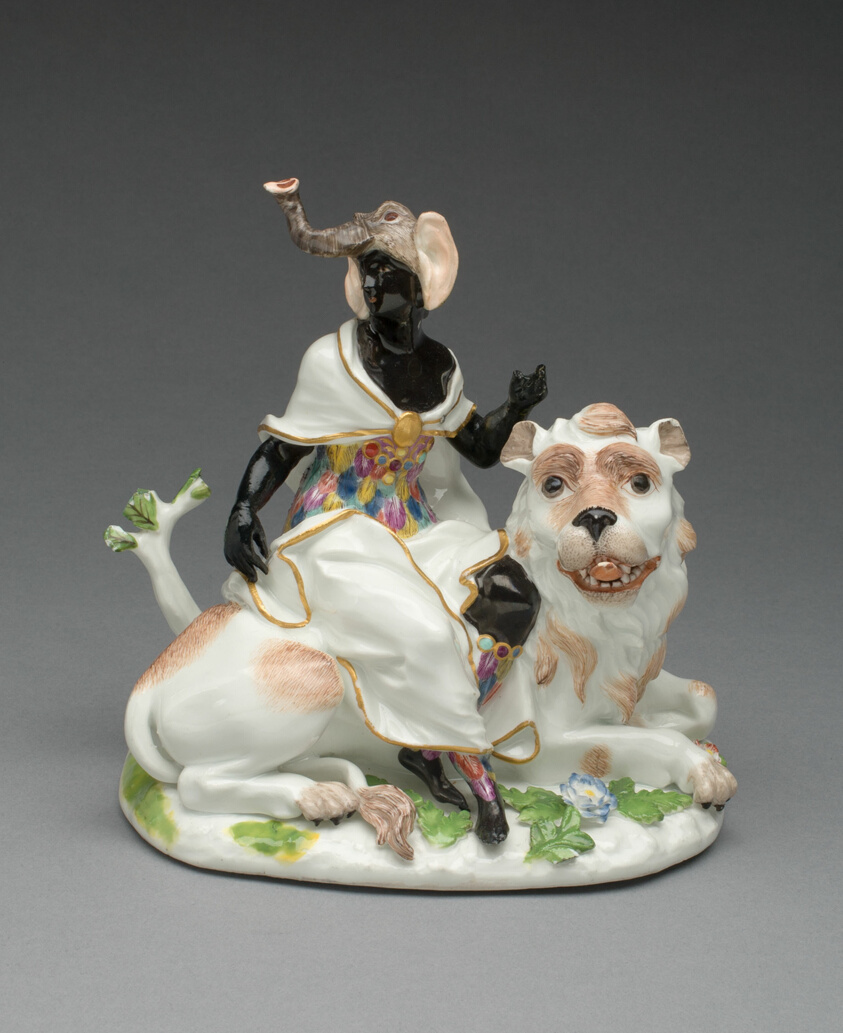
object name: Ceramics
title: Allegorical Figure Representing Africa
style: Rococo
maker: Meissen Porcelain Factory; Germany, founded 1710; Modeled by Johann Joachim Kändler; German, 1706-1775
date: 1746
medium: Hard-paste porcelain, polychrome enamels, and gilding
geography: Meissen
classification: sculpture; ceramics; porcelain; european decorative arts